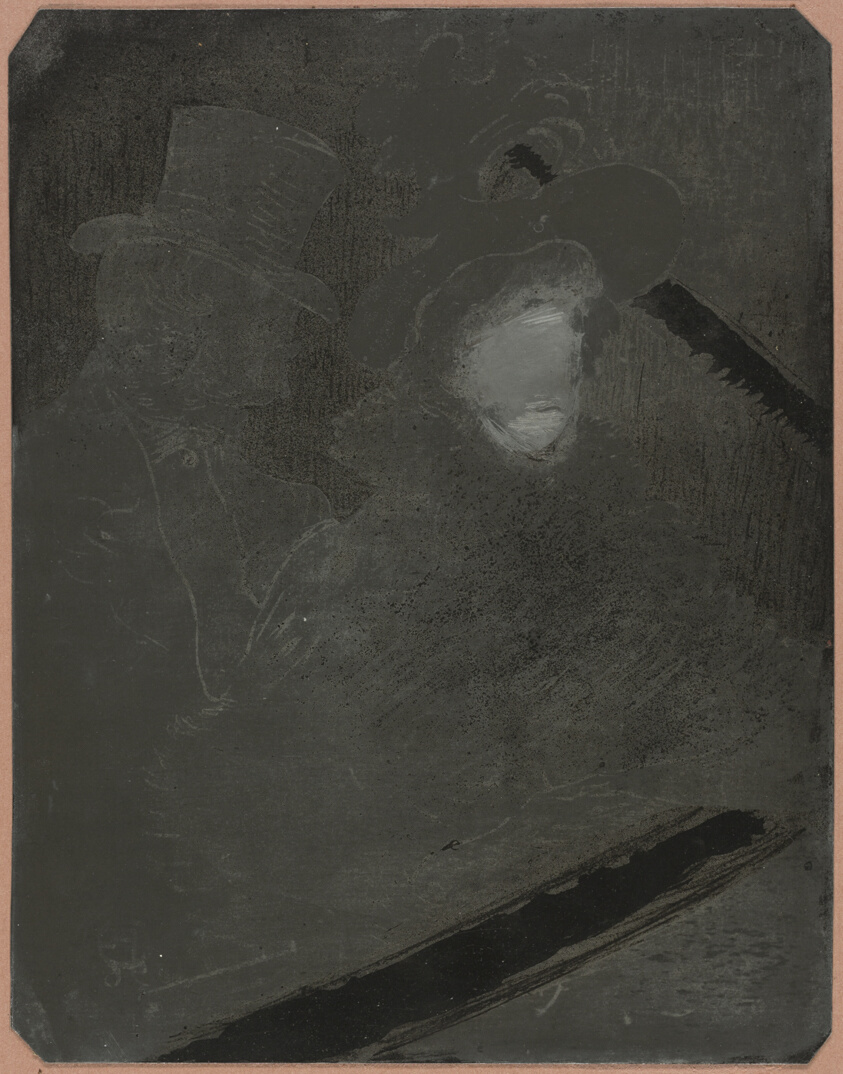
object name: Print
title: At the Concert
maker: Henri de Toulouse-Lautrec (French, 1864-1901)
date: 1896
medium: Zinc lithographic plate with corners removed and beveled edges, laid down on mauve board and taped to mat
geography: France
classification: zincograph; matrix; prints and drawing; print